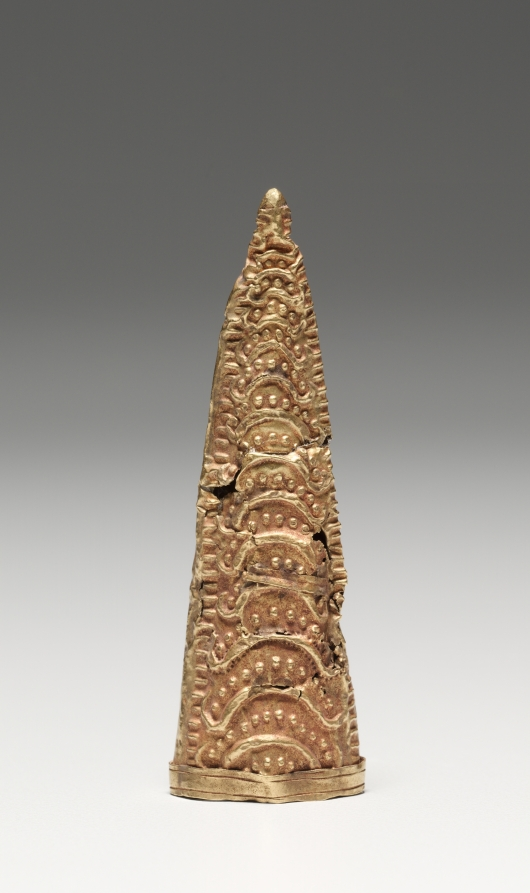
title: Knife-sheath tip (sika boha)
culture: Africa, West Africa, Ghana, Asante Empire/Kingdom, Kumasi or probably Kumasi, member of the goldsmiths' guild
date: 1800s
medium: Gold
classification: Arms and Armor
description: Gold sheaths covered the cast iron blade of a king’s ceremonial knife (sikay), wrapping them with symbolism. In Akan states like the Asante Kingdom, gold embodies life force (kra) and is the sun’s earthly counterpart. Only goldsmiths’ guild members could make gold ornaments for the royals and their entourage, or for the royal treasury. Here, the goldsmith used a tool to push the raised floral, leaf, and geometric designs from the back of a soft sheet of gold (repoussé technique). Small dots outlining some motifs were punched into the metal. Similarly decorated gold sheets and solid ornaments capped a knife’s handle.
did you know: This chape would have been secured to the very tip of a knife sheath, modeled after European style sheaths.